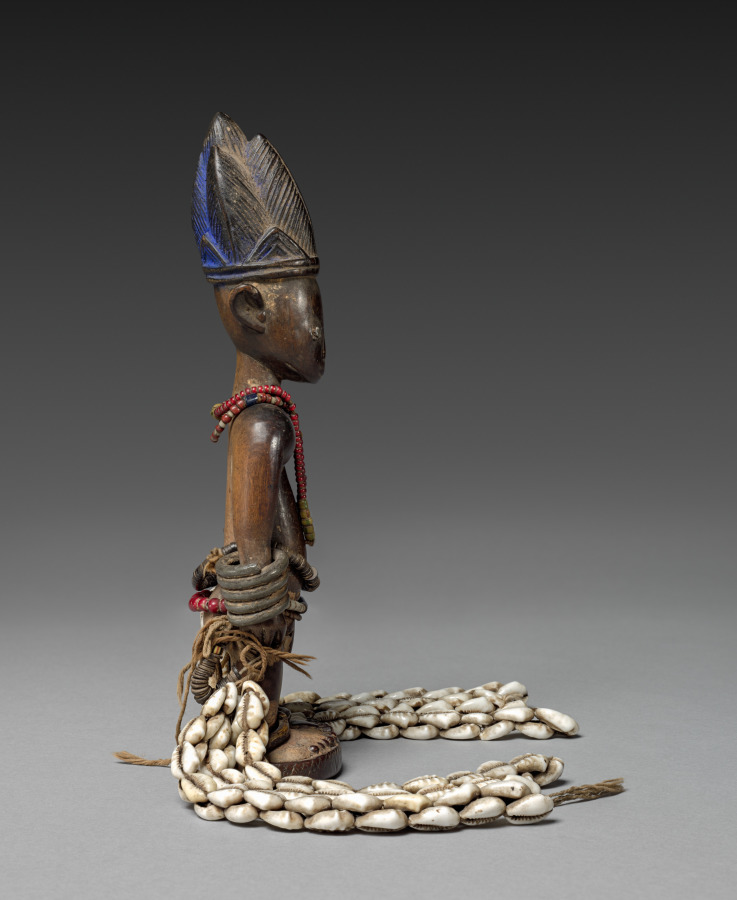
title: Twin Figure (Ère Ìbejì)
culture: Africa, West Africa, Nigeria, Yorùbá-style maker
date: late 1800s–early 1900s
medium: Wood, copper alloy, iron alloy, lead, glass beads, cowrie shells, twine, and pigment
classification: Sculpture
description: Such a figure is carved when a twin dies in infancy and serves as a memorial to the surviving sibling. These twin figures are always carved to look like adult individuals with idealized physical features. Various body adornments suggest the care parents devote to their children, while the erosion of facial features indicates the symbolic washing and feeding of the figure as a means to connect the soul of the deceased to that of the living twin.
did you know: This figure commemorates a twin that has died in infancy.